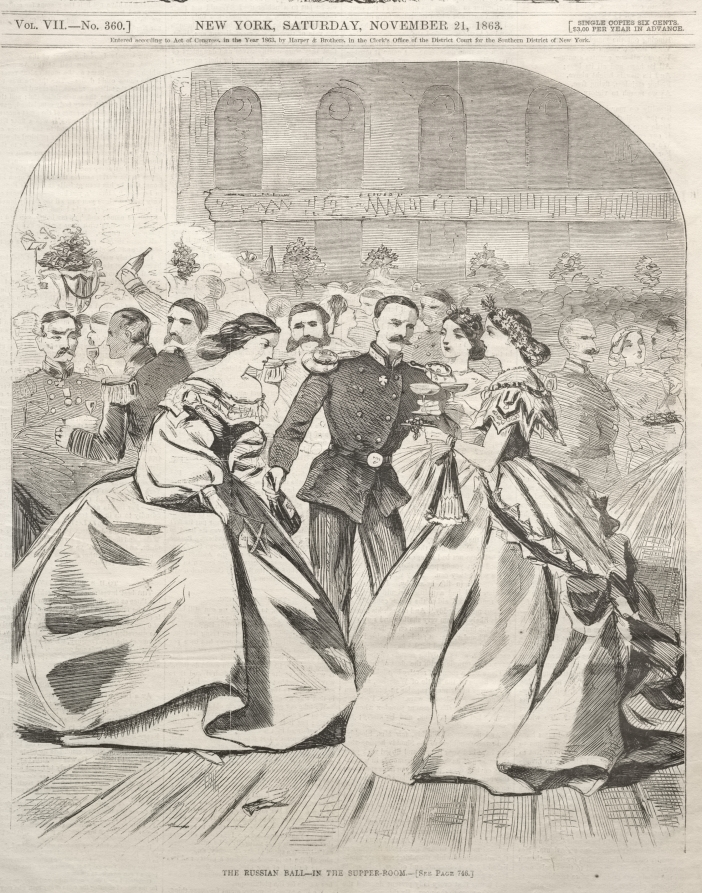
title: The Russian Ball - In the Supper Room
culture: America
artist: Winslow Homer (American, 1836–1910)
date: 1863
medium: wood engraving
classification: Print